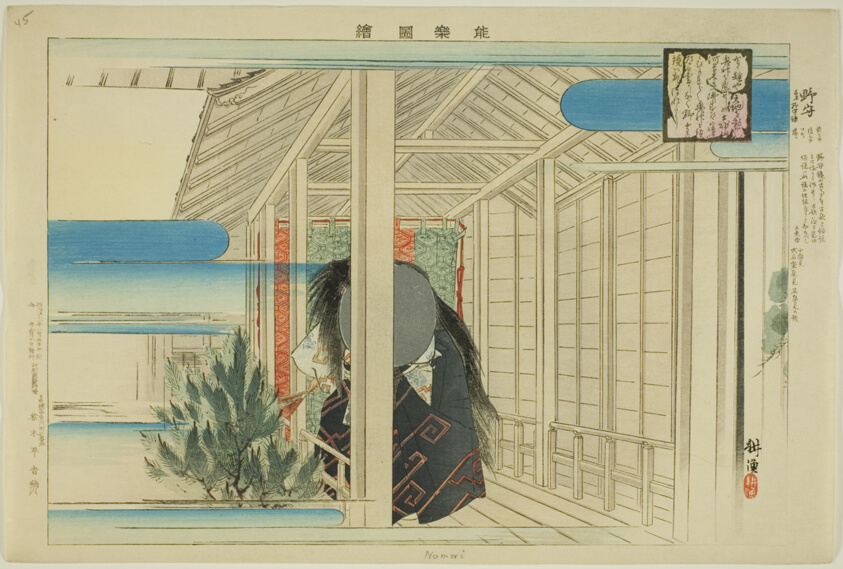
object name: Print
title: Nomori, from the series "Pictures of No Performances (Nogaku Zue)"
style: Japanese (culture or style)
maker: Tsukioka Kogyo; Japanese, 1869-1927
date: 1898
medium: Color woodblock print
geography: Japan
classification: woodblock print; print; asian art